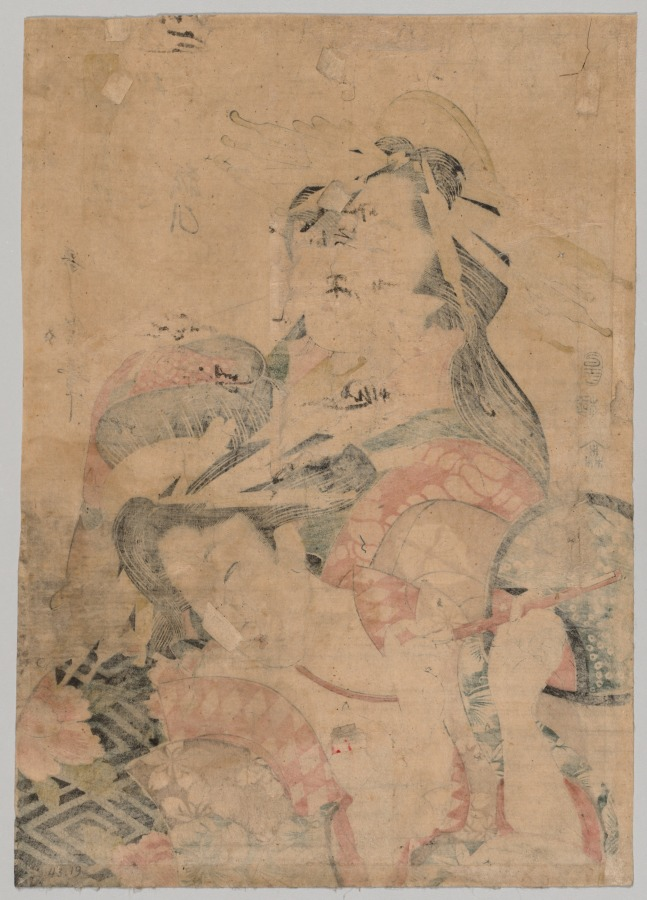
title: Half-length Portrait of Two Courtesans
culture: Japan, Edo period (1615–1868)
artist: after Kitagawa Utamaro (Japanese, c. 1754–1806)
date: 1753–1806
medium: color woodblock print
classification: Print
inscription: Signature: Utamaro fude Publisher Mark: Mori-ji (Jihei)